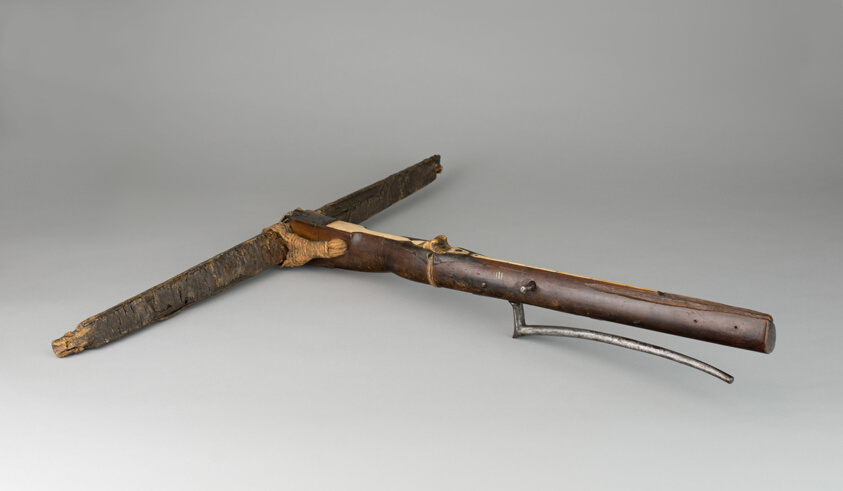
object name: Arms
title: Crossbow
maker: German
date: c.1450—c.1470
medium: Steel, iron, horn, bone, staghorn, birch bark, cherrywood, and hemp fiber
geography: Europe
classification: crossbow; arms; arms and armor